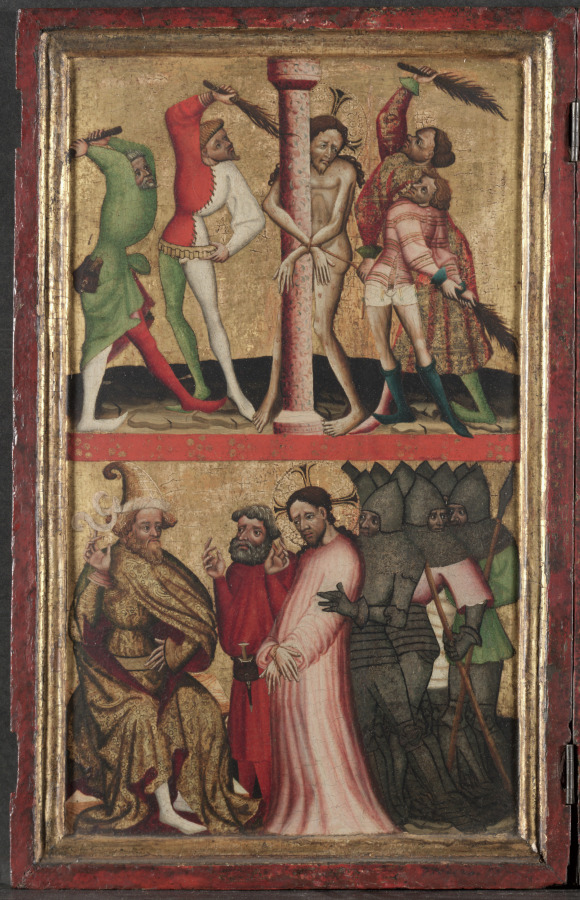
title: Diptych with the Passion of Christ (left wing):Flagellation and Christ Before Pilate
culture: Austria, Styria, 15th century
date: c. 1400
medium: tempera and gold on wood oak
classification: Painting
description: This diptych, or two-panel painting, is hinged at the center so that it could be opened and closed and easily transported. It was clearly designed as an object for private devotion. The owner would have been able to contemplate the Passion of Christ and pray before these scenes. The top two images depict Christ’s scourging at the pillar and the crowning of thorns, while the lower two show Jesus before Pontius Pilate and in the Garden of Gethsemane. The scenes would have been read clockwise beginning with the lower right. On the back of these panels are remnants of paintings that have since been scraped off.